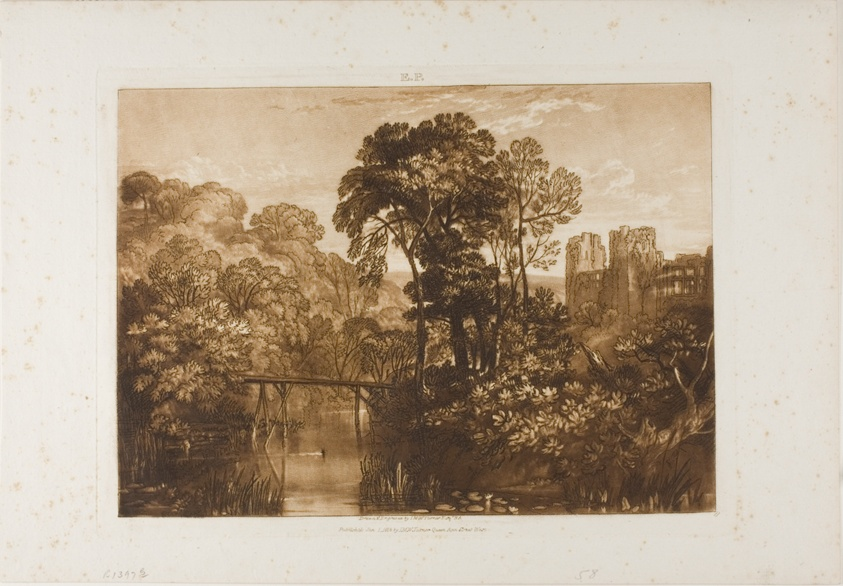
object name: Print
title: Berry Pomeroy Castle, plate 58 from Liber Studiorum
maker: Joseph Mallord William Turner (English, 1775-1851)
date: published January 1, 1816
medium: Etching and engraving in brown on ivory laid paper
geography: England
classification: etching; print; prints and drawing